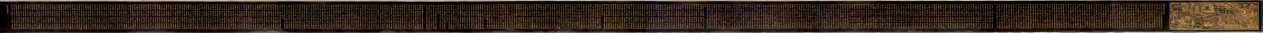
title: Lotus Sutra with a Frontispiece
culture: China, Song dynasty (960–1279)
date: late 1100s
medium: handscroll; gold ink on indigo sutra paper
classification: Painting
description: The frontispiece of this sutra, a sacred Buddhist scripture, illustrates episodes mentioned in the Buddha’s teaching. The sutra begins with a description of the historic Buddha Shakyamuni’s assembly on Vulture Peak. On the right, the Buddha sits amid members of his congregation: lohans (or arhats), bodhisattvas, gods, and other beings. The narrative proceeds from right to left. Heavenly light emanates from Shakyamuni’s brow to “illuminate the eighteen thousand worlds to the east.” Illustrated immediately below the ray is the sutra’s promise that if anyone carves or paints images of the Buddha “they will achieve the Buddha path.” The female figures in the frontispiece point to another promise made in this popular Mahayana school sutra, namely that female devotees and nuns who read the sutra are promised Buddhahood and salvation.